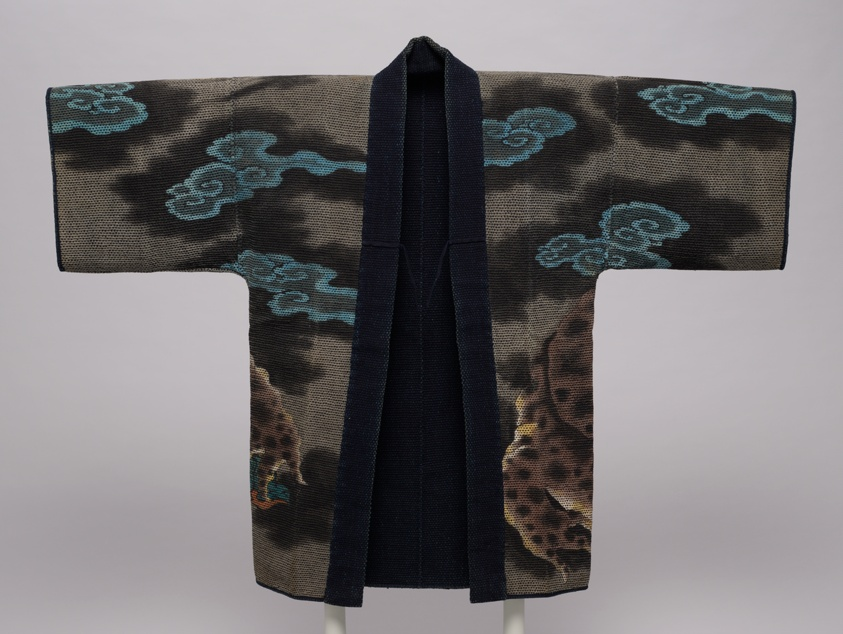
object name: Textile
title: Fireman's Coat (Hikeshi Sashiko Banten)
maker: Japan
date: Meiji period (1868–1912), c. 1875-1900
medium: Cotton, plain weave, quilted (sashiko); painted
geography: Japan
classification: textile; needlework (visual works)